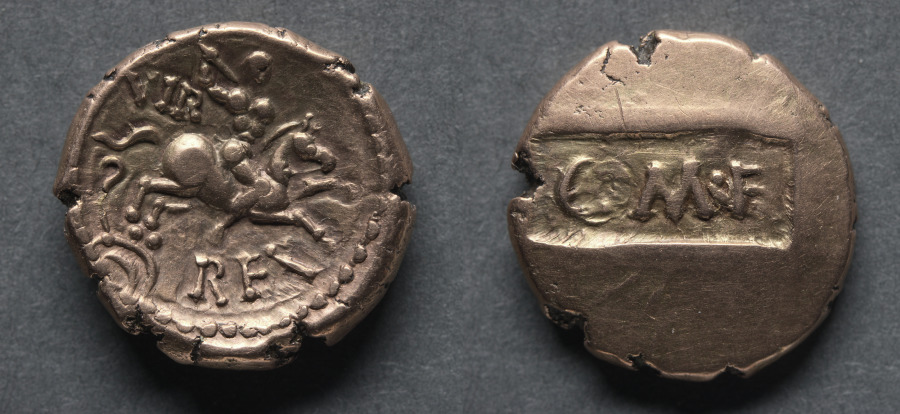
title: Verica Stater: Sunken Tablet (obverse); Horse and Rider (reverse)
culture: England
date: c. 10–40 CE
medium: gold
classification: Coins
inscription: "COM F"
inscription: VIR REX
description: Verica was the youngest son of Commius. He is identified as the Bericus whom the historian Sion Cassius refers to as being in exile, and appealing to Claudius for help. Commius was king of the Atrebates. When Caesar was planning his first visit to Britain, some Britons sent him envoys with offers of hostages and allegiance to Rome. Caesar received them favorably and retained no hostages but sent Commius and his high commissioner with instructions to persuade the Britons to ally themselves with Rome, and to expect Caesar in person in a few weeks time. This took place in 55 BC. It is therefore possible that Verica was either born fairly late in his father's life or that he was illegitimate. However that may be, his reign can with reasonable accuracy be placed as being in the first and second quarters of the first century AD.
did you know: Verica was king just before the conquest of Britain by the Romans.